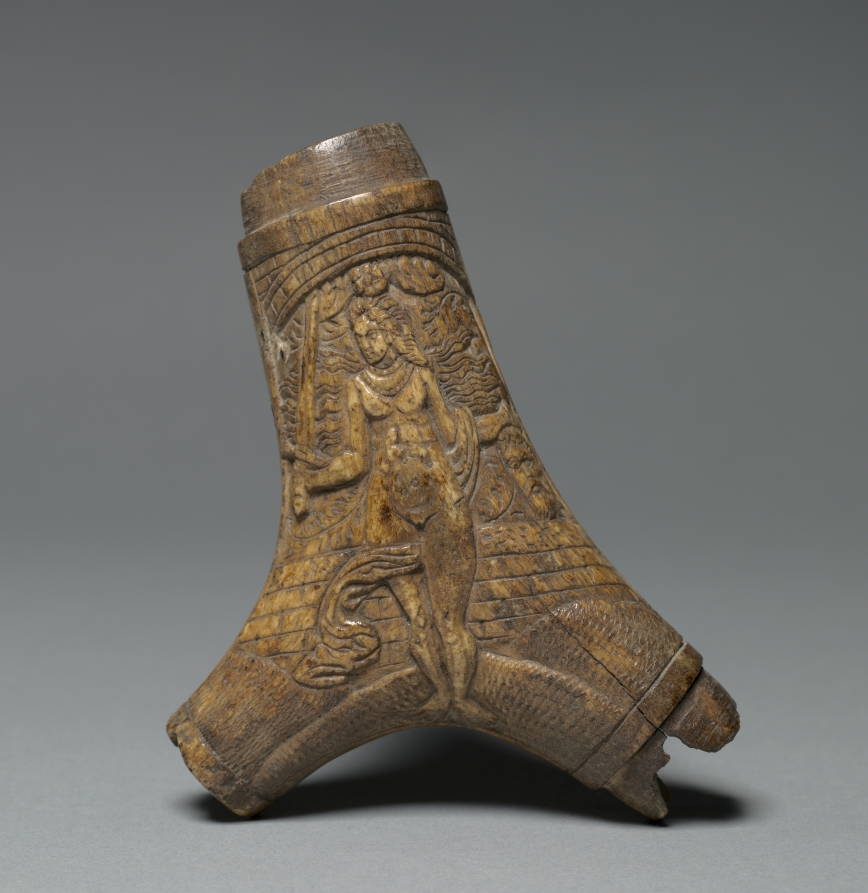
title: Powder Flask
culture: Germany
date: c. 1570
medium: staghorn (two branches) carved with relief scene of Judith and Holofernes; mounts missing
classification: Arms and Armor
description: Powder flasks are small, portable containers designed to hold gunpowder. From the 1400s to the 1800s, powder flasks were indispensable for charging and priming firearms of all types. Without powder flasks firearms were of little use to their owners. Many highly decorated flasks rank as works of art. During the 1500s, they were frequently decorated with images of famous historical figures. Here the figures of Judith and Holofernes derive from the Old Testament.